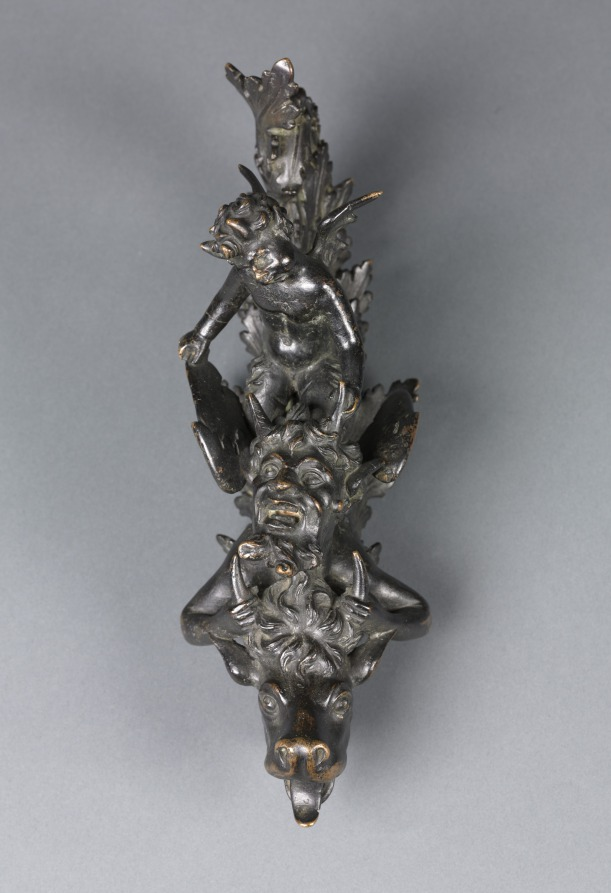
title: Doorknocker with Two Satyrs Riding an Ox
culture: probably Italy, Style of Padua, 16th Century, 19th century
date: 1800s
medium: bronze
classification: Sculpture